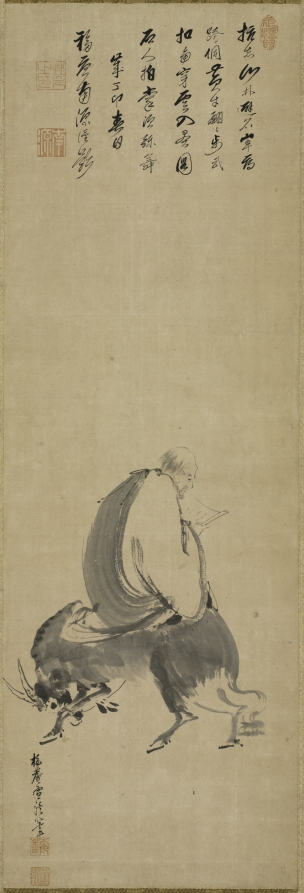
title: Weizheng Riding on an Ox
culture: Japan, Edo period (1615–1868)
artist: Yamaguchi Sekkei (Japanese, 1644–1732)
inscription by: Nanyuan Xingpai (Chinese, 1631–1692)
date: 1687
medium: hanging scroll; ink on paper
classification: Painting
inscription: 関房印 正法（灋）眼/抗志山林邂名宰蒋/ 跨個黃牛翩翩步武/ 扣角穿雲入聖圖/ 石人拍掌須彌舞/ 筆丁卯春日/ 福唐南源 謹題/ 印（上）性派之印/ 印（下）南源/ 款記 梅庵雪渓筆/ 落款印（上）梅庵（下）雪渓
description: The inscription at the top of this painting was brushed by Ōbaku school monk Nanyuan Xingpai (Japanese: Nangen Shōha), a Chinese Buddhist monk who emigrated to Japan in 1654, while the painting was done in ink by Yamaguchi Sekkei, a Japanese painter active in Kyoto who was known for his Buddhist subjects, many of which remain in temples today. The figure here reads a text while riding backward upon a water buffalo. Sekkei's painting depicts the Chinese monk Weizheng (986–1049), also known as "Zheng of the Yellow Ox" after his favored mount. Nanyuan's inscription is a poem about the monk.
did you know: The Ōbaku lineage of the Zen school of Buddhism in Japan is named for Mount Huangbo (Japanese: Ōbaku) in China.